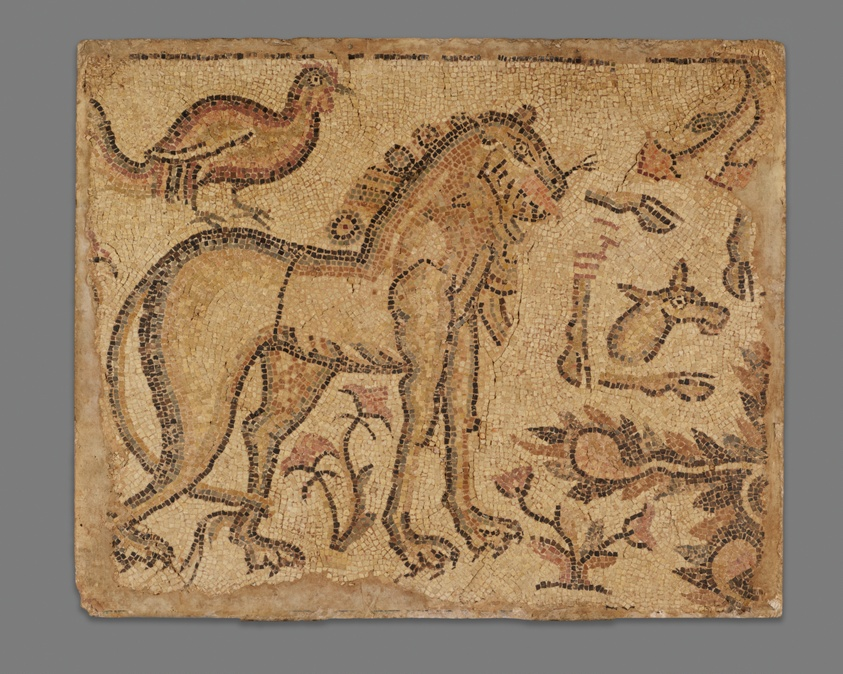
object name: Architectural fragment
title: Lion and Bird with Other Animal Parts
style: roman (ancient, style or period), ancient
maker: Late Roman; probably Eastern Mediterranean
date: 4th-5th century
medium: Stone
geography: Italy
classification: mosaic; ancient art; architectural fragment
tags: lions, animals